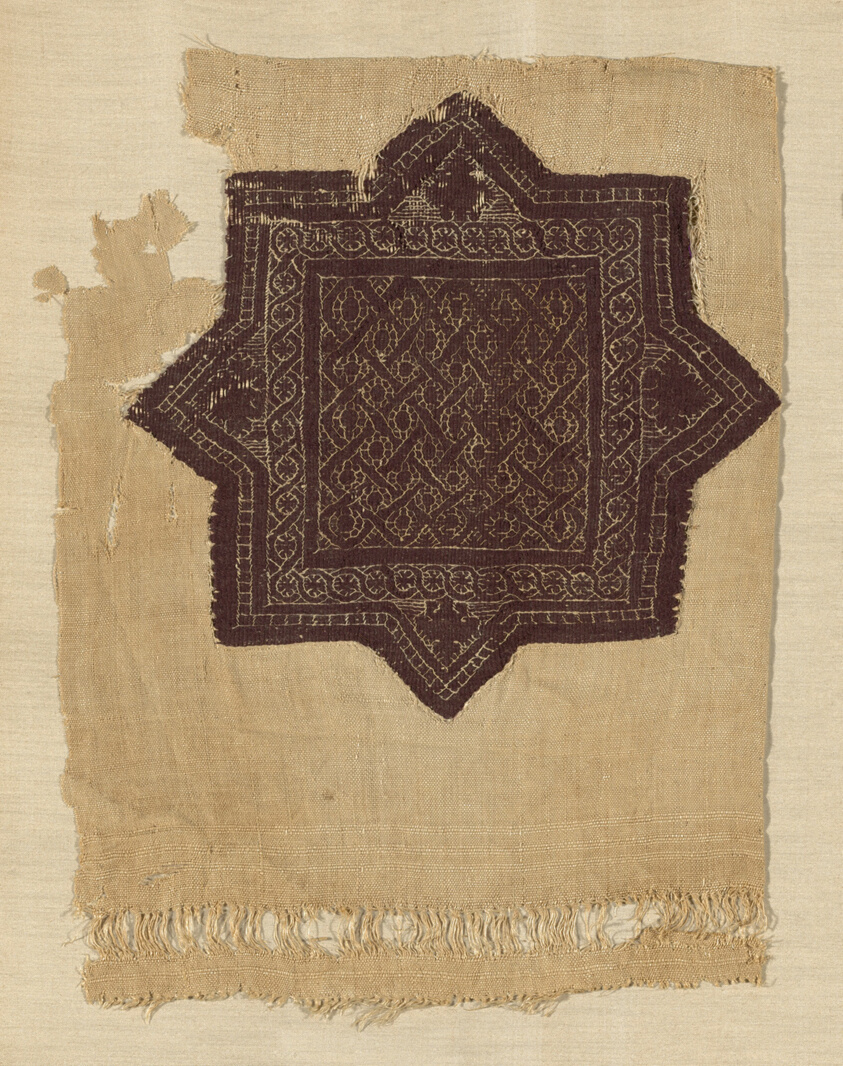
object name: Textile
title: Panel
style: roman period (egyptian), coptic (period)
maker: Coptic; Egypt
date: Roman period (30 B.C.– 641 A.D.), 4th/6th century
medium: Linen and wool, tapestry weave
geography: Egypt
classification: textile; weaving